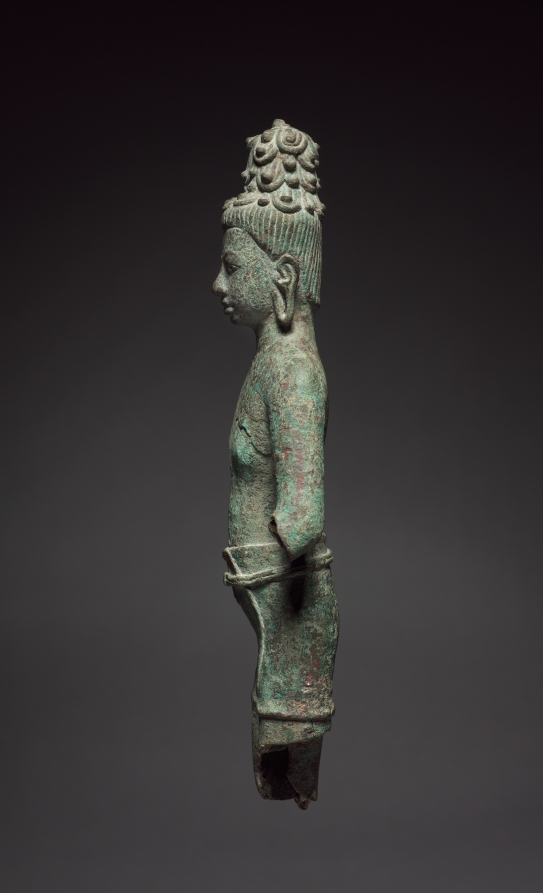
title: Bodhisattva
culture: Northeastern Thailand, Khorat Plateau, Buriram Province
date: 700s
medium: bronze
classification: Sculpture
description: This rare image survives from the early phase of Buddhist sculpture in Southeast Asia. Made in what is known as the Pra Khon Chai style, it has the characteristic sensitive expression, slender physique, and looped locks of hair. The broken limbs reveal the clay core over which the bronze was cast using the lost-wax method.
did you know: This sculputre was reportedly found as part of a group, some of which are much larger in scale.